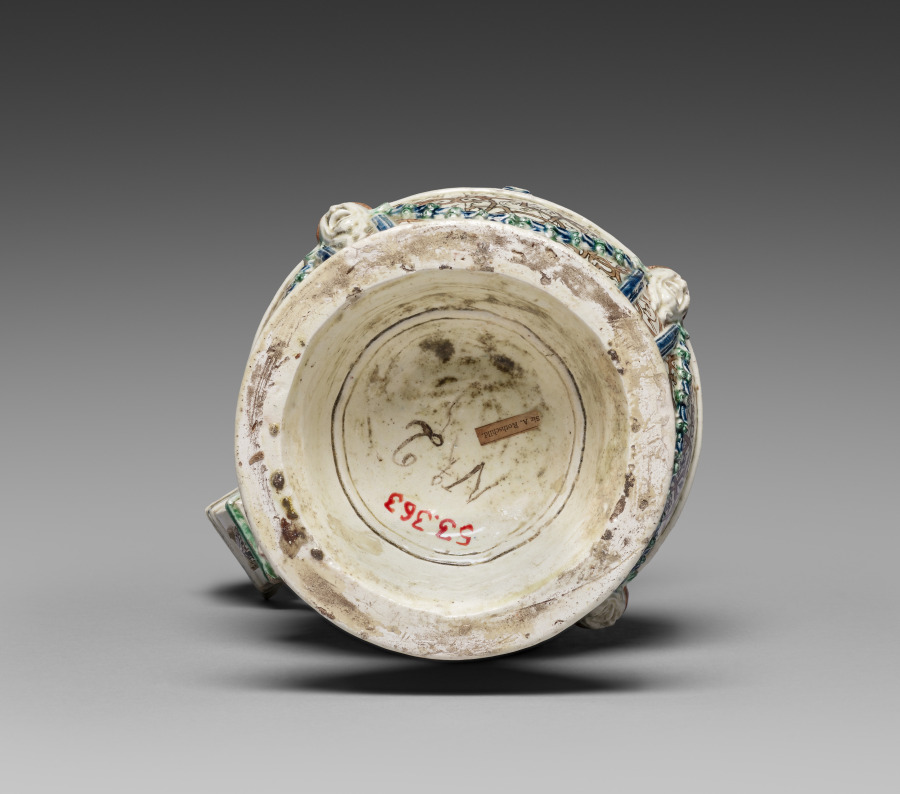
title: Ewer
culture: France, 16th century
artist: Saint-Porchaire (French)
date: c. 1540–67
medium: lead-glazed, white-paste earthenware with inlaid slip decoration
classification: Ceramic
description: An example of one of the most extravagant wares of this kind, this ewer is decorated with applied masks and frogs as well as a variety of stamped and inlaid designs. The shape and patterns reflect the metalwork of the time—the final period of this artistic pottery.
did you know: The green tree frog was one of the symbols of French King Henri II, indicating that this ewer may have either been made for the king or one of his courtiers.